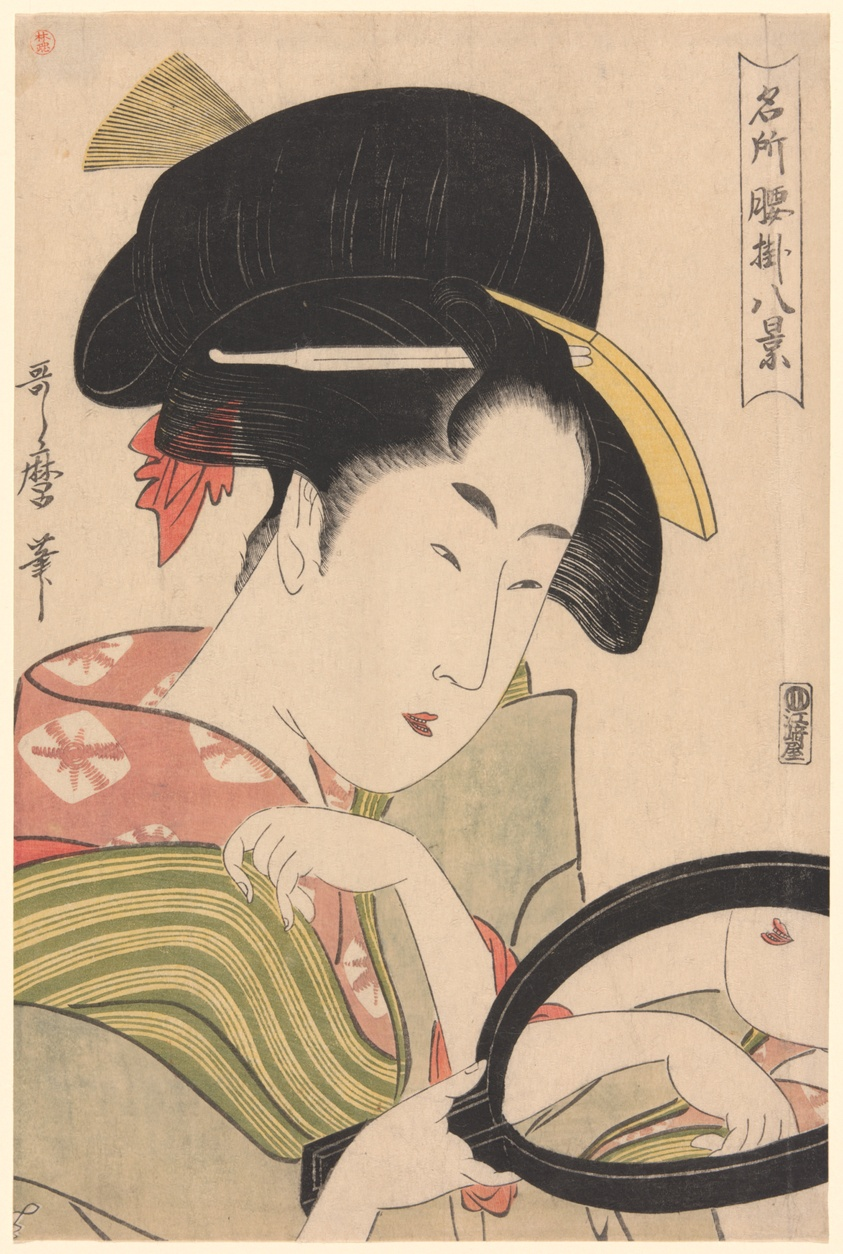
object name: Print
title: Mirror, from the series “Eight Views of Tea-stalls in Celebrated Places" ("Meisho koshikake hakkei")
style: Japanese (culture or style)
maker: Kitagawa Utamaro 喜多川 歌麿; Japanese, 1753 (?)-1806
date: c. 1795/96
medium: Color woodblock print; oban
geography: Japan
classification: woodblock print; print; asian art